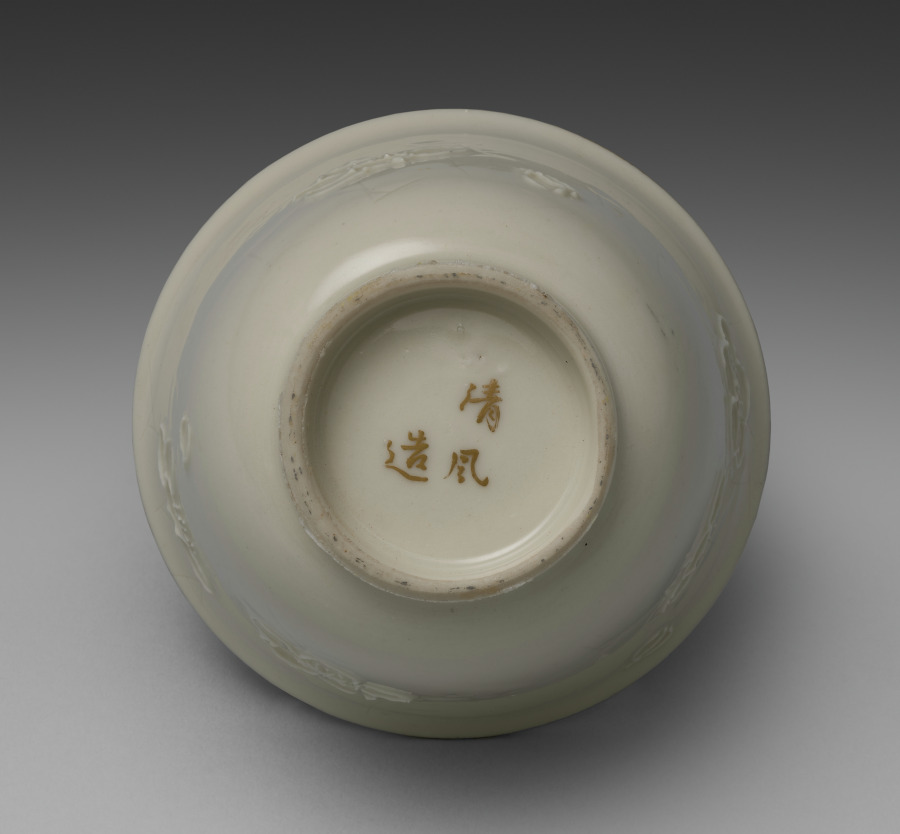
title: Drinking Cup from Dining Set with Plum Blossoms and Cracked-Ice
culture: Japan, Meiji period (1868–1912)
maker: Seifū Yohei II (Japanese, 1844–1878)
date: c. 1875–78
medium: Porcelain with molded designs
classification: Ceramic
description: Each item in this set has a delicate low-relief design of flowering plum branches over scattered, intersecting lines meant to resemble the cracked-ice surface of a frozen body of water and is signed on the base in gold pigment. While Yohei II produced many fine works in underglaze blue, like those produced by Kiyomizu Shichibei, he also made works in quite different styles later in his career, from the early 1870 s. In 1873, he was appointed purveyor to the Industrial Center of Kyoto Prefecture, a designation associated with Kyoto’s efforts to reach an international market through the port of Kobe; and from 1875 until his death, he was involved in national-level projects to present Japanese ceramics across the world. It was during this period that Yohei III was apprenticed to Yohei II, and it has been suggested that this set may in fact be an early example of Yohei III’s work, which he signed with his teacher’s name. Decorated with flowers resembling Japanese textile motifs, the set calls to mind the design of Yohei II’s pair of vases with plum blossoms in the Victoria and Albert Museum. Here, the elaborate trees created for a formal public exhibition setting have been translated into the approachable blossoms of the genteel domestic environment. While the designs are consistent across the pieces, each raised flower petal and pistil and each incised line in the ice was done by hand, so the cups, bowls, and dishes are similar yet unique. The bottoms of two boxes once identified the set’s owner, but the information has been deliberately obscured with black ink. However, inscriptions still visible appear to indicate two occasions, once at the end of July 1886 , and once again in June 1916 , when parts of the set were requested from Hokura in Niigata Prefecture. The location corresponds to a neighborhood in the present-day city of Jōetsu. The surname Tsuji 辻 also appears on a paper tag affixed to one of the box cloths. Future research may possibly reveal more about their provenance. A vase by Yohei III in a private collection combines the formal grandeur of the Yohei II vases in the Victoria and Albert Museum with the gentler design of this dining set, placing flowering plum trees against soft, scalloped-edge clouds resembling those in golden screens.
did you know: The dining wares have a creamy white coloration that the four boxes containing them identify as Korean in style.